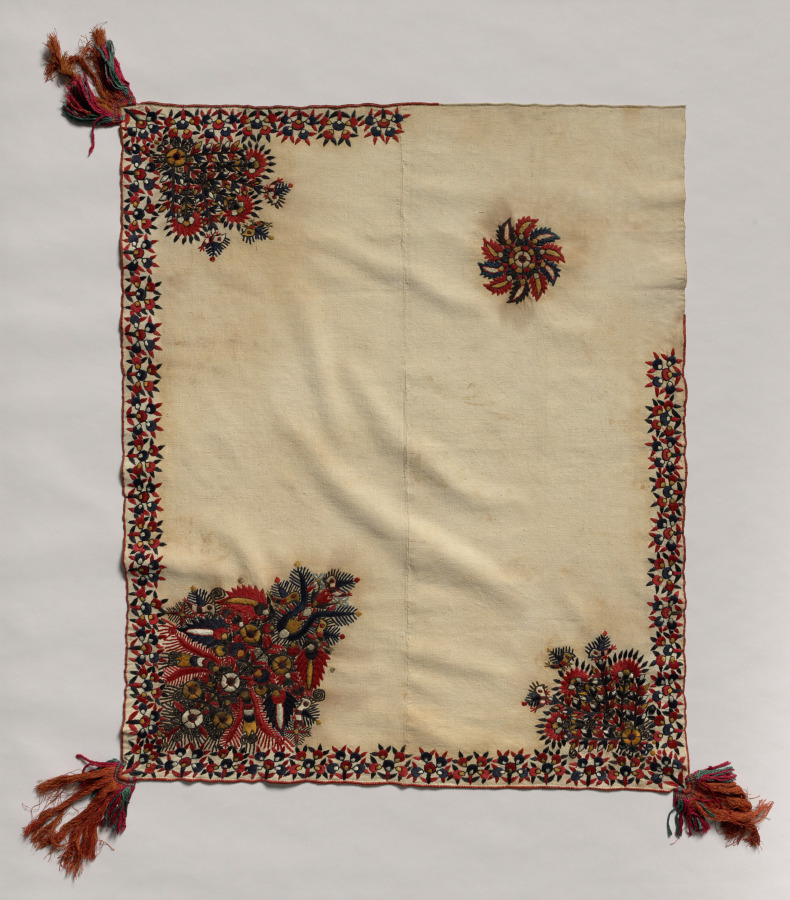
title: Furnishing textile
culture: Africa, North Africa, Algeria, Algerian embroiderer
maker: Algerian Embroiderer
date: 1800s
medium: Linen, silk, dye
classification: Embroidery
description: This textile is woven using undyed linen in a technique called a tabby weave. The artist then used red, blue, white, and ochre yellow silk threads to create embroidered floral borders and designs in each corner, topped with several birds. The style of these motifs also strongly resembles Turkish embroideries made in this period.